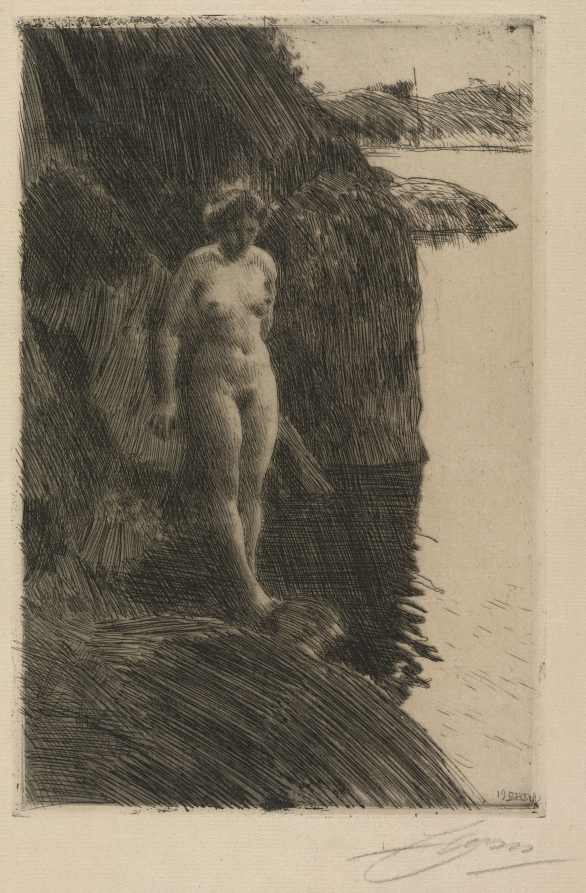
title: Precipice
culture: Sweden, 20th century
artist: Anders Zorn (Swedish, 1860–1920)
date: 1909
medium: etching and drypoint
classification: Print